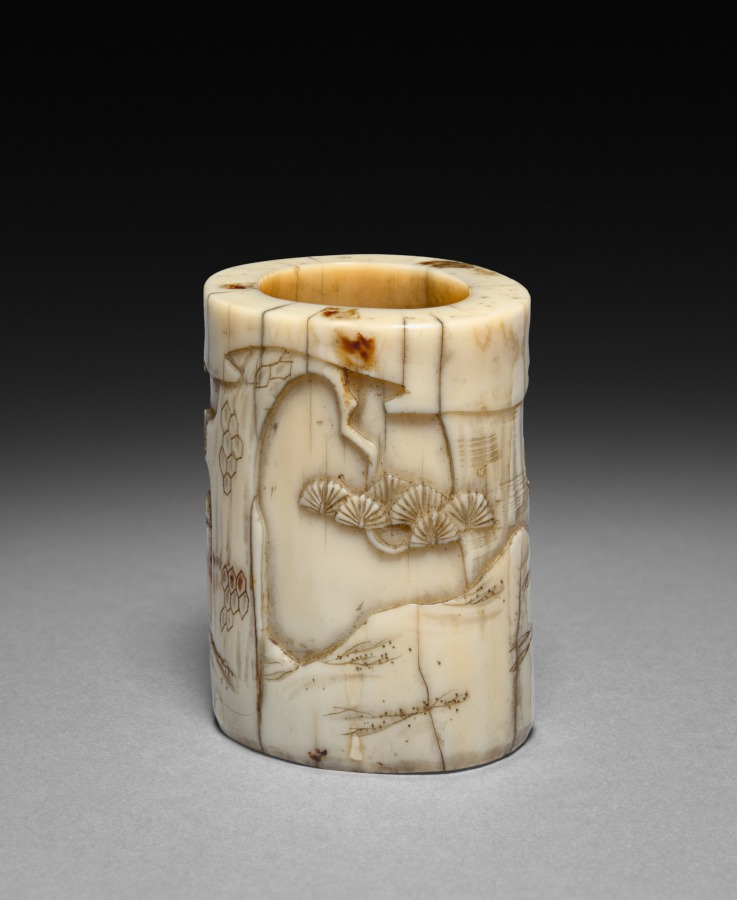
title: Carved Tusk with Chinese Immortal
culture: Japan, Meiji period (1868–1912)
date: c. 1868–1912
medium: Carved ivory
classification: Ivory